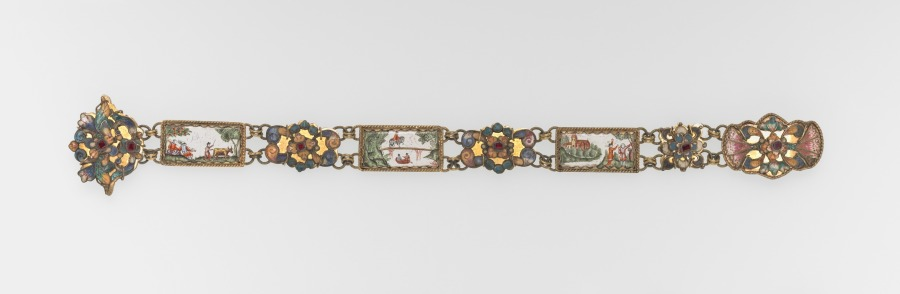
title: Belt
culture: Netherlands, early 18th century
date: 1700s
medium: enamel on copper with gilt metal mounts and cloisonné medallions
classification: Enamel